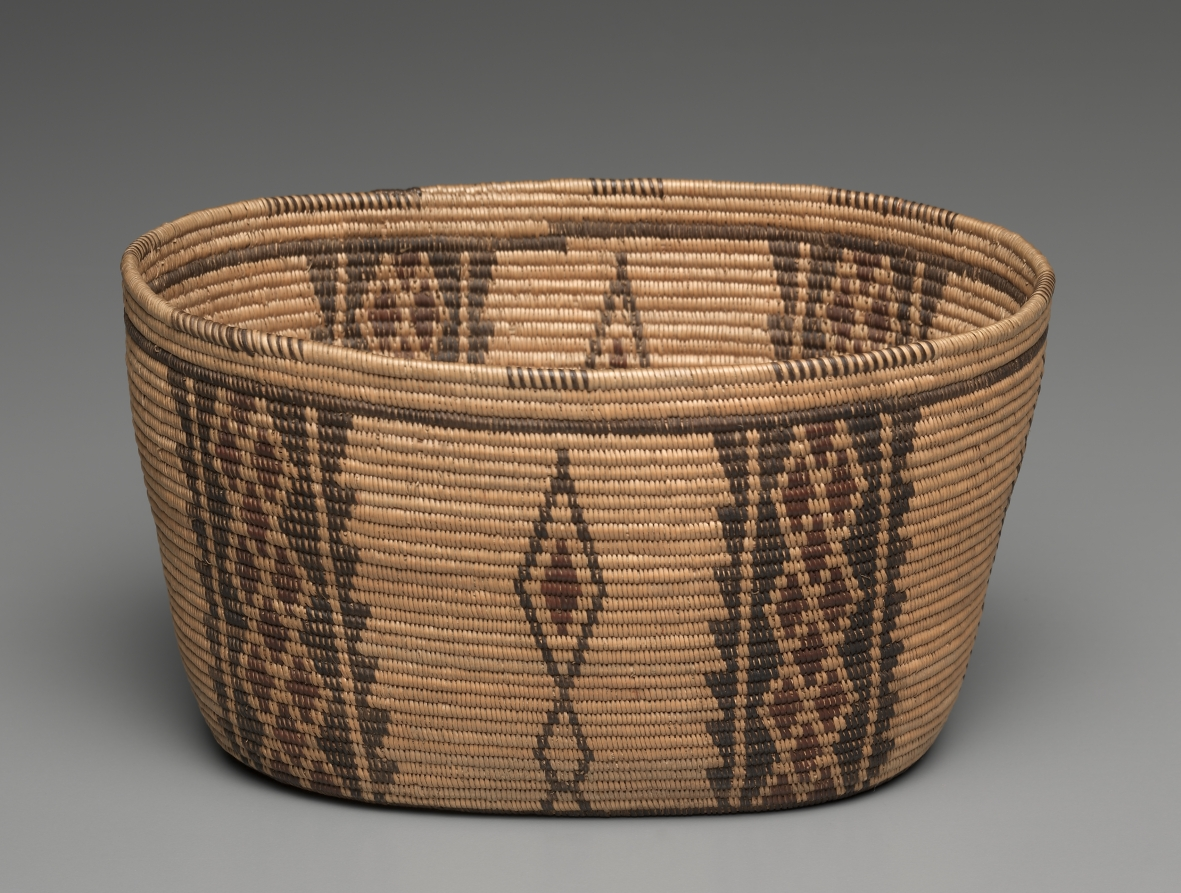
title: Bowl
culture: Great Basin, Timbisha Shoshone (Panamint)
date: c 1900–1910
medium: willow, devil's claw, yucca root; coiled (3 rods)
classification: Basketry